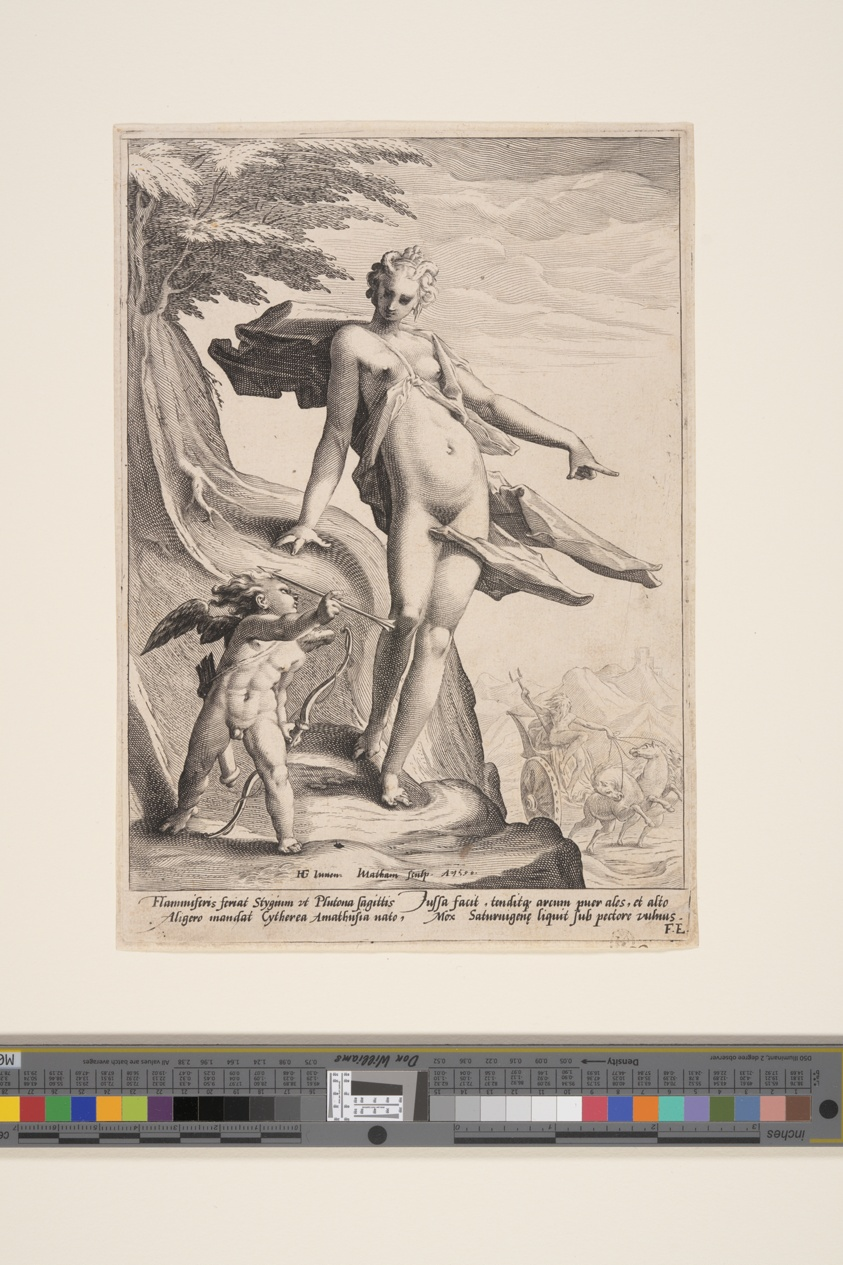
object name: Print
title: Venus, Cupid and Pluto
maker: Jacob Matham (Dutch, 1571–1631); after Hendrick Goltzius (Dutch, 1558–1617)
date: 1590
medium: Engraving on laid paper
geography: Netherlands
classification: print; engraving; paper; prints and drawing